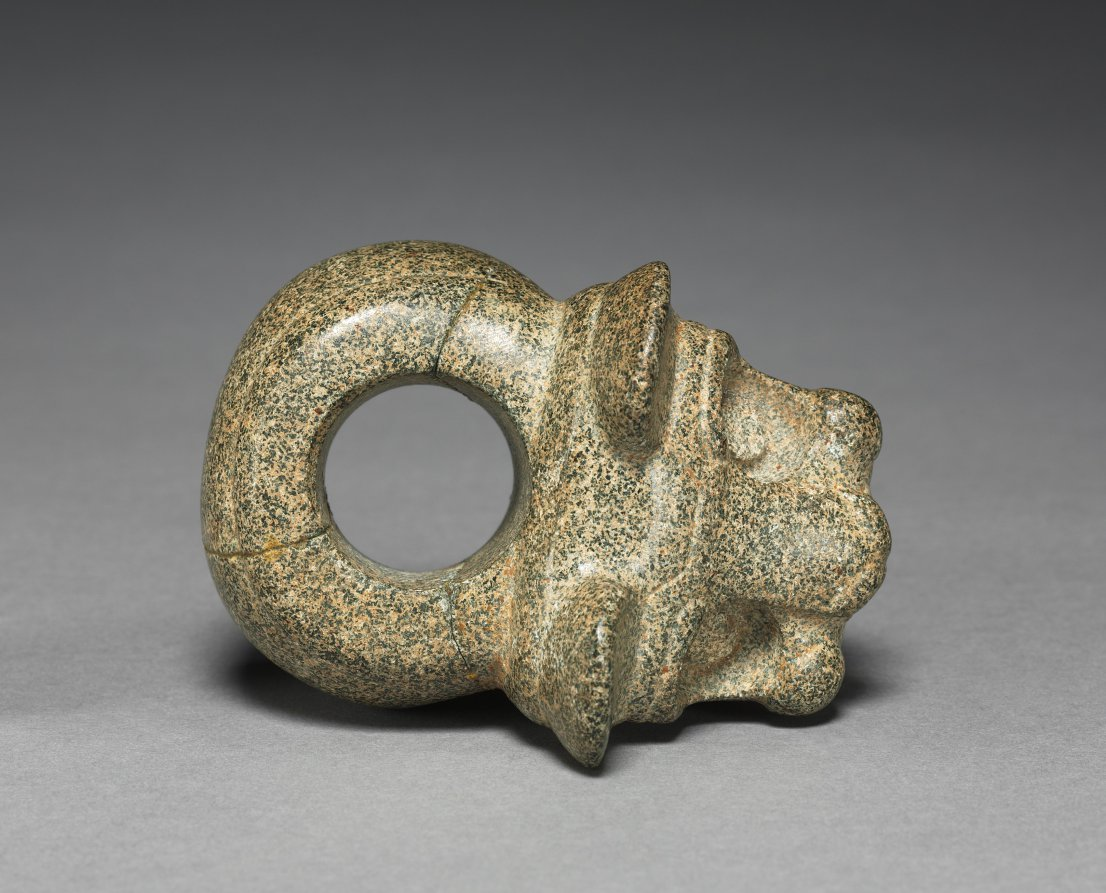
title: Ceremonial Mace (Club) Head: Feline (Jaguar?)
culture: Costa Rica, Southern Nicoya region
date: c. 300 BCE–600 CE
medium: stone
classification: Stone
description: Probably once mounted on wooden shafts, these objects could have served as symbols of chiefly authority, group insignia, the heads of ceremonial weapons, or all three. They eventually were placed in elite graves. The bird may be a male curassow and the feline, a jaguar.